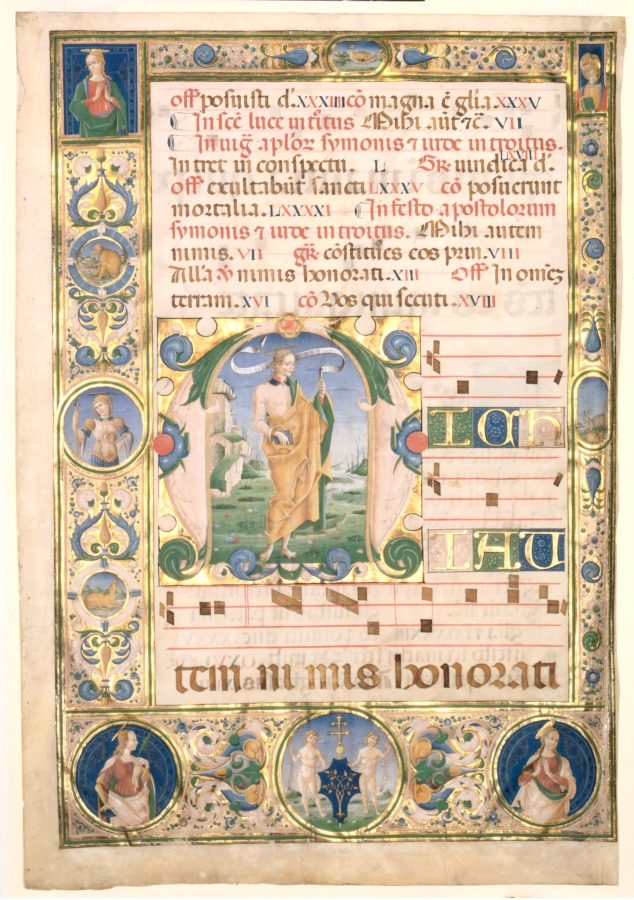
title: Pair of Graduals: Initial (M) with St. Andrew (recto) and Mass for the Dead (recto)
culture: Italy, Ferrara, 15th century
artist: Jacopo Filippo d' Argenta (Italian, 1501)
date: c. 1480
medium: ink, tempera, and gold on parchment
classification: Manuscript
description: This leaf was excised from a volume of a large set of choral books known to have been commissioned by Bartolomeo delle Rovere for Ferrara Cathedral. Delle Rovere, nephew of Pope Sixtus IV, was the Bishop of Ferrara from 1474 to 1494 and his arms appear in the rondel at the bottom of the page-a shield bearing an oak tree (rovere in Italian) surmounted by a patriarchal cross, the symbol of his rank and authority. Payment records indicate that Argenta worked on the choir books for Ferrara Cathedral from 1478 to 1486. The initial M introduces the chant for the Introit (introduction) to the mass for the Feast of Saint Andrew, celebrated on November 30th. This date also marks the beginning of the Advent season (leading to Christmas) in the liturgical calendar.